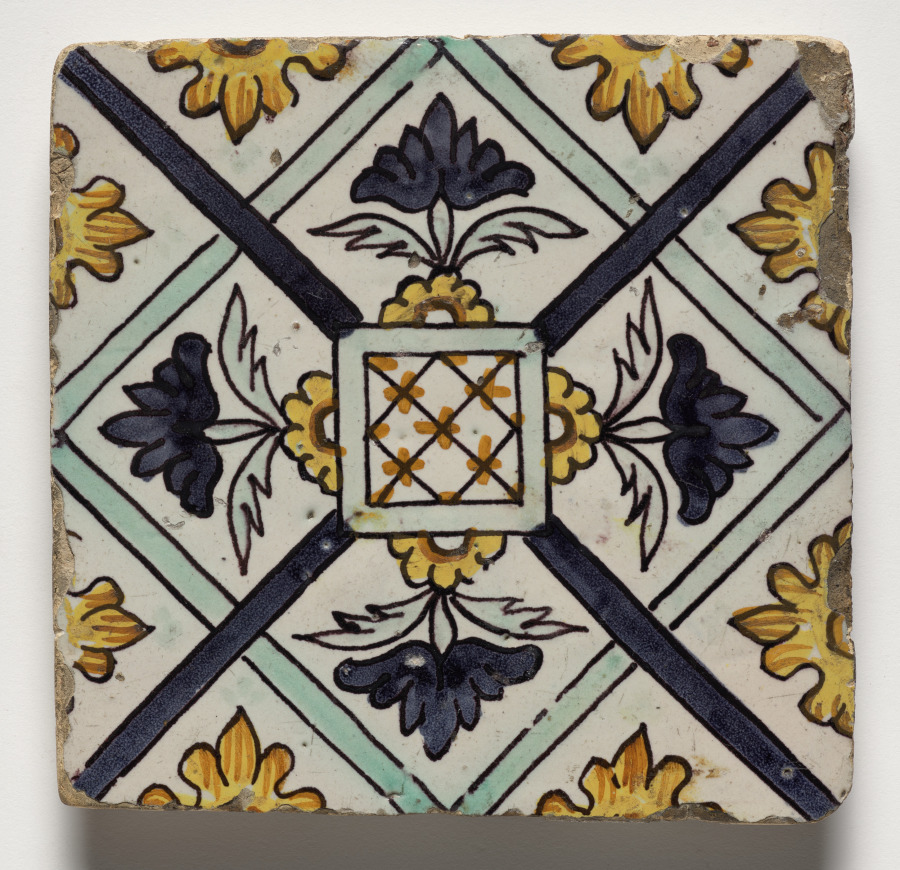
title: Tile- Central Motif in Diamond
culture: Netherlands, Holland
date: 1700s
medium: glazed ceramic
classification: Ceramic